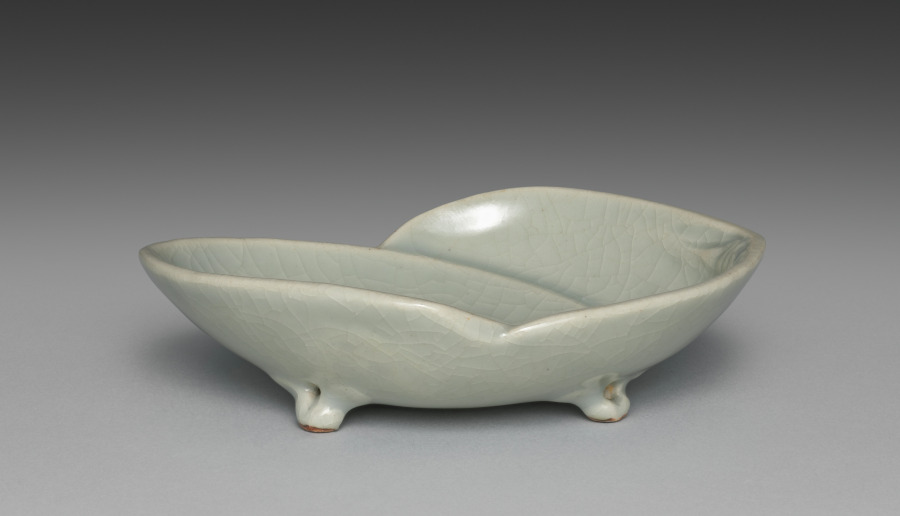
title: Dish from Dishes with Matching Shells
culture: Japan, Meiji period (1868–1912)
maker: Seifū Yohei III (Japanese, 1851–1914)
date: 1893–1914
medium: One of a pair of dishes; porcelain with celadon glaze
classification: Ceramic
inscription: 清風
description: Yohei III’s main output for his sophisticated clientele was in the form of tea sets and dining sets. He created a range of dishes in green glazes. He often produced in pairs, sets of five, or sets of ten. This pair of shell dishes have a box lid interior attestation by Yohei IV that the dishes were made by Yohei III with a cracked-ice (hyōretsu) pattern in the glaze, omitting reference to any glaze coloration.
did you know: These shell-shaped dishes are of the saucer type, suitable for dipping sauces.